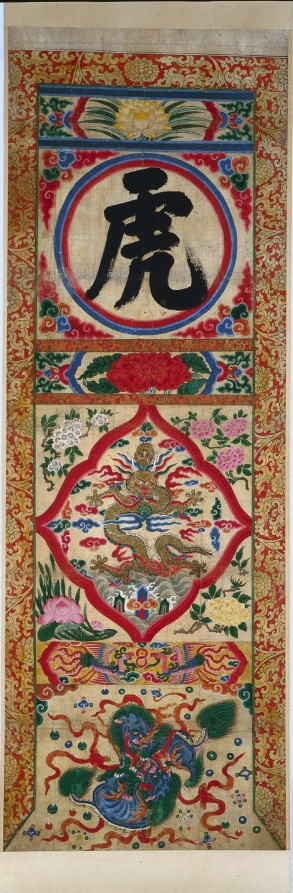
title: Painted Panel of Character "Tiger"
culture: Korea, Joseon dynasty (1392–1910)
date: early 1900s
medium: hanging scroll, ink and color on paper; unmounted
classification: Painting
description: This set of four colorful hanging scrolls may have been used in an outdoor Buddhist ritual to evoke heavenly blessings. Each hanging scroll bears four different character; tiger, dragon, whistle, and recite. Traditionally, tiger and dragon belong to the four directional guards, respectively west and east.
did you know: This set of four colorful hanging scrolls may have been used in an outdoor Buddhist ritual to evoke heavenly blessings.